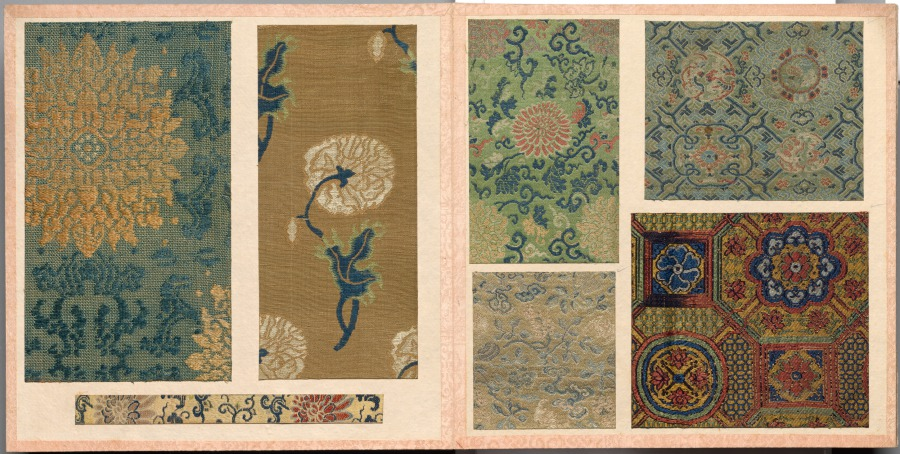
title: Album of Textile Samples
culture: Japan and China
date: 1700s–1800s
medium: silk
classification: Textile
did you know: This album contains 46 pages with 156 mounted Chinese or Japanese textile samples.